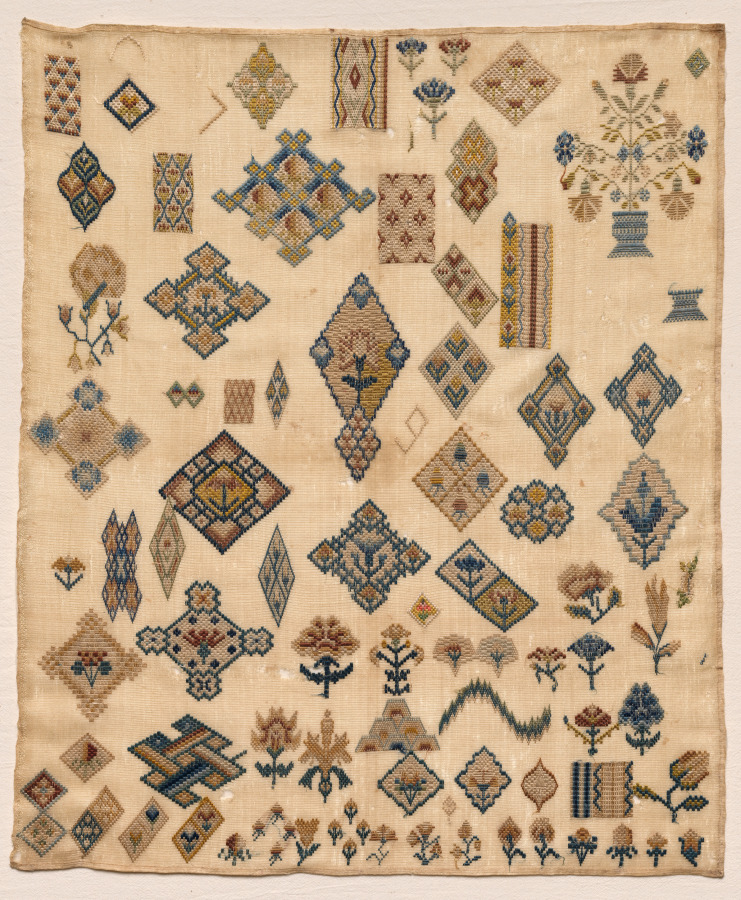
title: Sampler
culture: Italy ?, late 19th century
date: late 1800s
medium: embroidery, silk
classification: Sampler